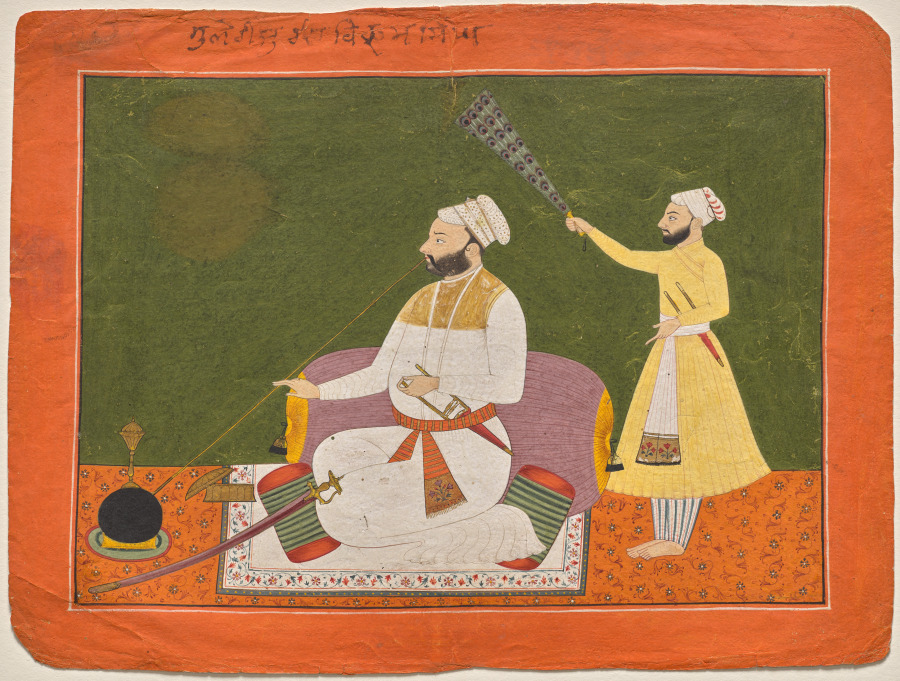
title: Raja Bikram Singh of Guler smoking a hookah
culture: Northern India, Pahari kingdoms, Himachal Pradesh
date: c. 1678–90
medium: gum tempera, ink, and gold on paper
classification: Painting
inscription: gulerīyā rāja bikrama siṃgha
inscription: On Verso Devanāgari numerals: 53 Arabic numerals: 2.74 English notation: No.138 C Two purple ink stamps: Chughtai Museum Trust Mian Salah Mimar Lane 4 Garden Town Lahore-16 Pakistan 850733 Single black stamp in Urdū: Chughtai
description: The portrait of Raja Bikram Singh is the earliest depiction of a Guler chief and was produced in Chamba, possibly under the patronage of Raja Chattar Singh (r. 1664–90). The painting bears several features of early portraiture in Chamba—a straight Hookah pipe, striped trousers, large bolsters, and the sitting posture of the raja.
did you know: Raja Bikram Singh was famed for his physical strength and could break a coconut into pieces with his fingers